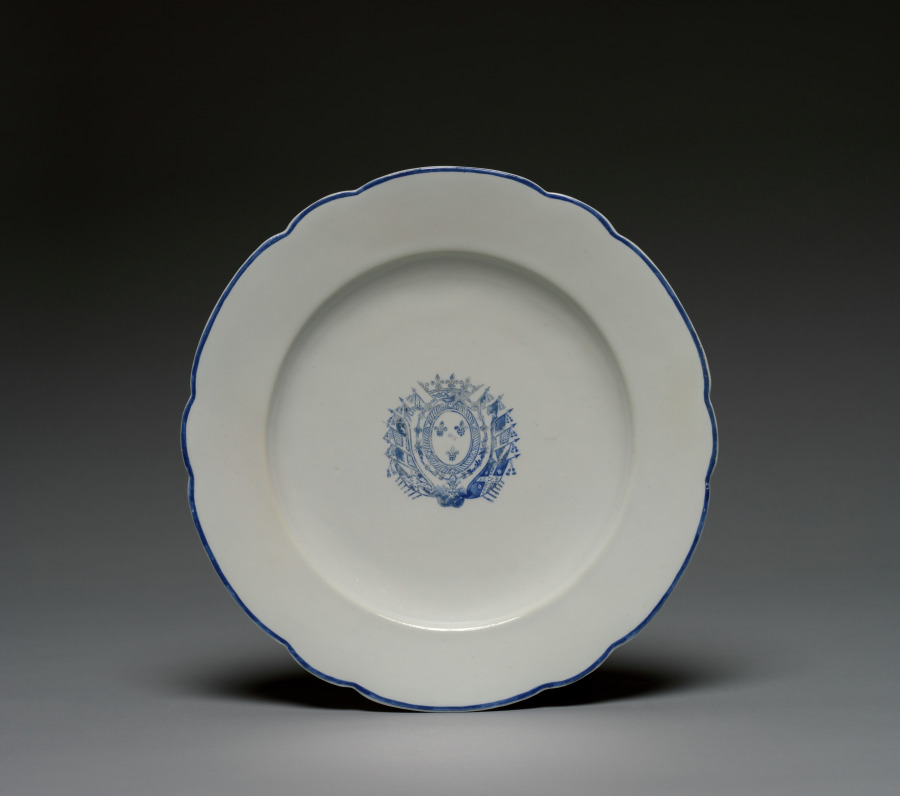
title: Plate (Assiette)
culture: France, Chantilly, 18th century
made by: Chantilly Porcelain Factory (French)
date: c.1785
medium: Tin-glazed soft-paste porcelain with enamel decoration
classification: Ceramic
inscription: [In blue enamel, hunting horn and "L"]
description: This plate is part of a dinner service commissioned by Louis Joseph, duke of Bourbon, prince of Condé. Painted with his coat of arms, composed of three fleur-de-lys encircled by a cord holding up a pendant with the order of the Holy Spirit and surmounted by the prince’s own crown, this plate’s decoration reinforces the prince’s position as an elite member of the French royal court.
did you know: The glaze of this plate contains tin, an early practice used at the Chantilly porcelain factory that counteracted the yellowish tint of the soft-paste porcelain with a white, opaque finish.